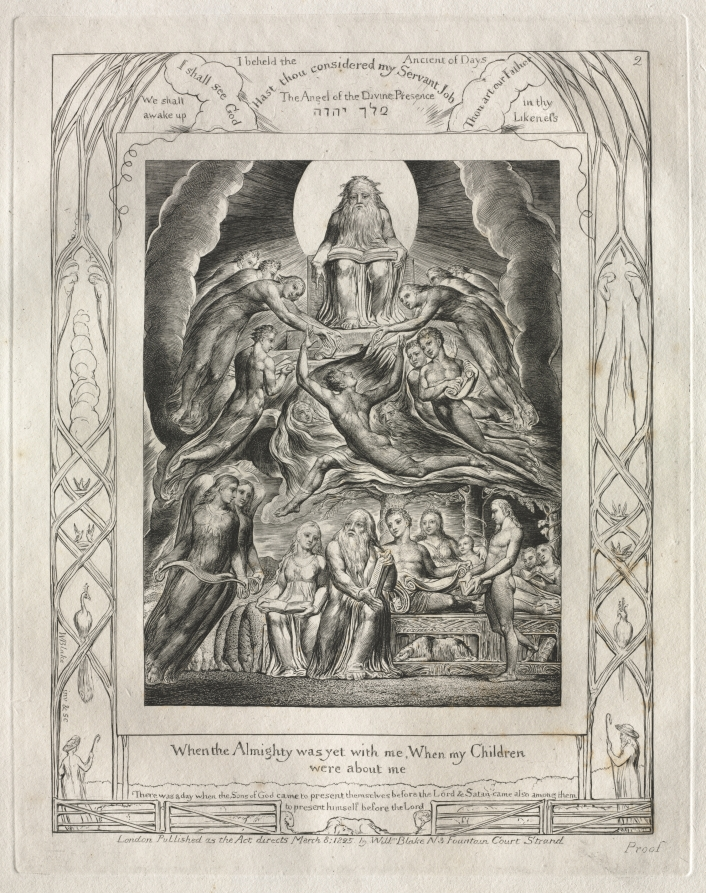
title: The Book of Job: Pl. 2, When the Almighty was yet with me, When my Children / were about me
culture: England, 18th century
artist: William Blake (British, 1757–1827)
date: 1825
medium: engraving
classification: Portfolio